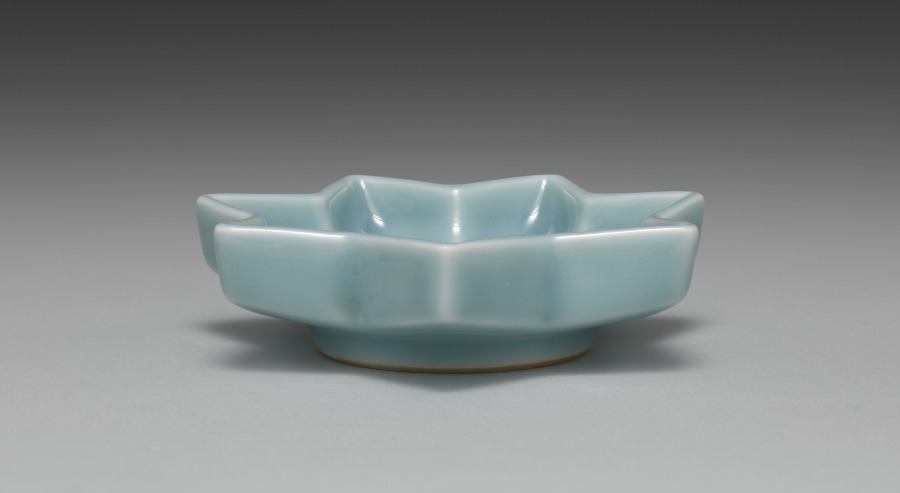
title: Saucer from Maple Leaf-Shaped Saucers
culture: Japan, Meiji period (1868–1912)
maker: Seifū Yohei III (Japanese, 1851–1914)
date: 1893–1914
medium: One of five dishes from a set of ten; porcelain with blue glaze and molded design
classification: Ceramic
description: These maple leaf–shaped saucers, like Yohei III's five shell saucers CMA 2022.188, have a long, horizontal box with a separate compartment for each piece. Now a set of five, these dishes were originally a set of ten, stored in two boxes of five each. From their housings, which accommodate differing numbers of objects, one can hypothesize that while some items created by the Seifu studio were intended to be acquired in larger sets, and thus were perhaps made to order, others, like these, may have been items to be purchased of the shelf in set quantities that allowed clients flexibility in scale. The box for these five saucers describes them as “heavenly blue[–glazed] porcelain” (tenseiji). The veins of the leaves are slightly raised in the clay so that the glaze pools around them and they stand out as white where the glaze thins. There are longer lines at the points of the leaves and shorter ones following the wall of each indentation so that the design has both a horizontal and a subtle vertical dimension.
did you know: Each leaf-shaped saucer in this set has a round foot.